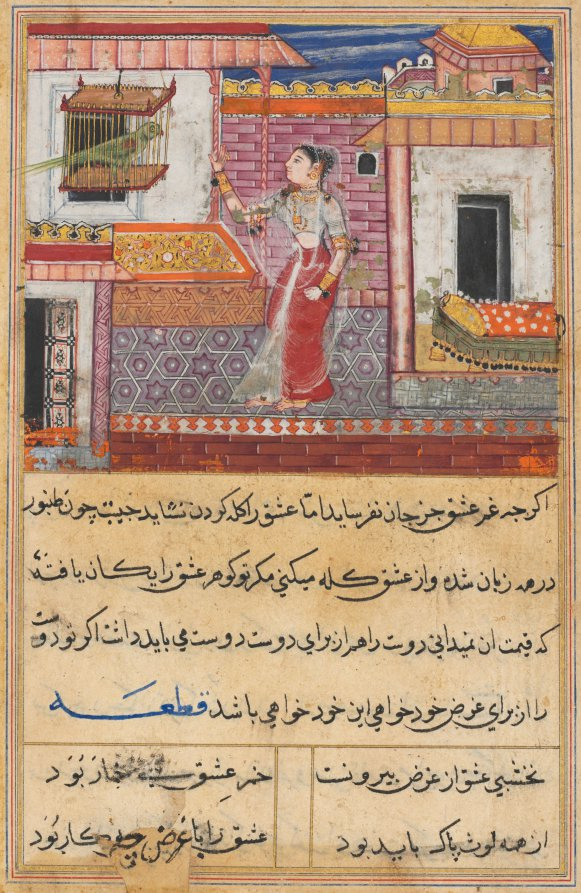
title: The Parrot Addresses Khujasta at the Beginning of the Thirteenth Night, from a Tuti-nama (Tales of a Parrot)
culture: Mughal India, court of Akbar (reigned 1556–1605)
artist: Tara 1 (Indian, active 1550s-1590s)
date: c. 1560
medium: gum tempera, ink, and gold on paper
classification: Painting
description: Before Khujasta can leave to meet her lover, Tuti the talking parrot begins to tell her a story of the conference of eighty wise men and the infant prince who was judged by his musical tastes.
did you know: The bricks in the courtyard were originally painted orange.